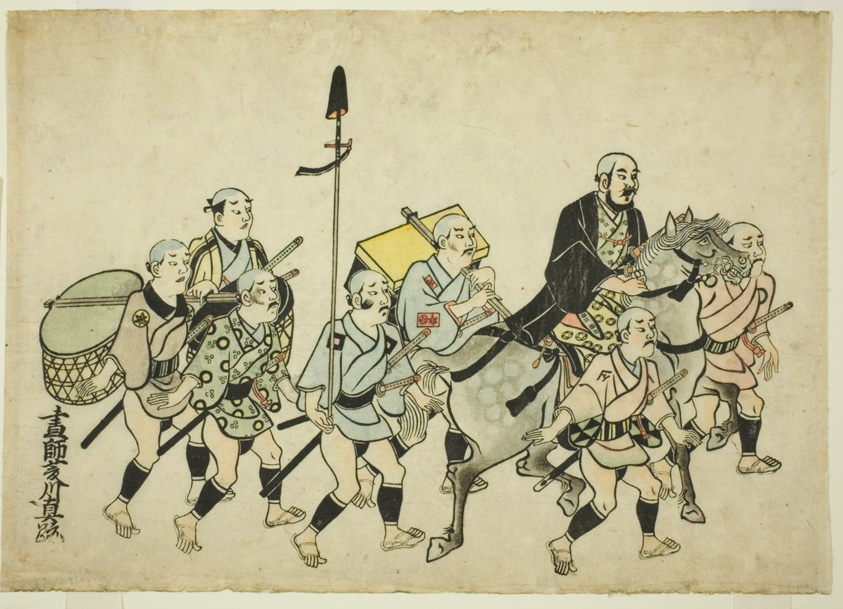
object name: Print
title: Procession of a Daimyo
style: Japanese (culture or style)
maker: Hishikawa Moronobu (Japanese, (?)-1694)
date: c. 1681/84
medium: Hand-colored woodblock print; oban yoko-e, sumizuri-e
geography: Japan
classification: woodblock print; print; asian art